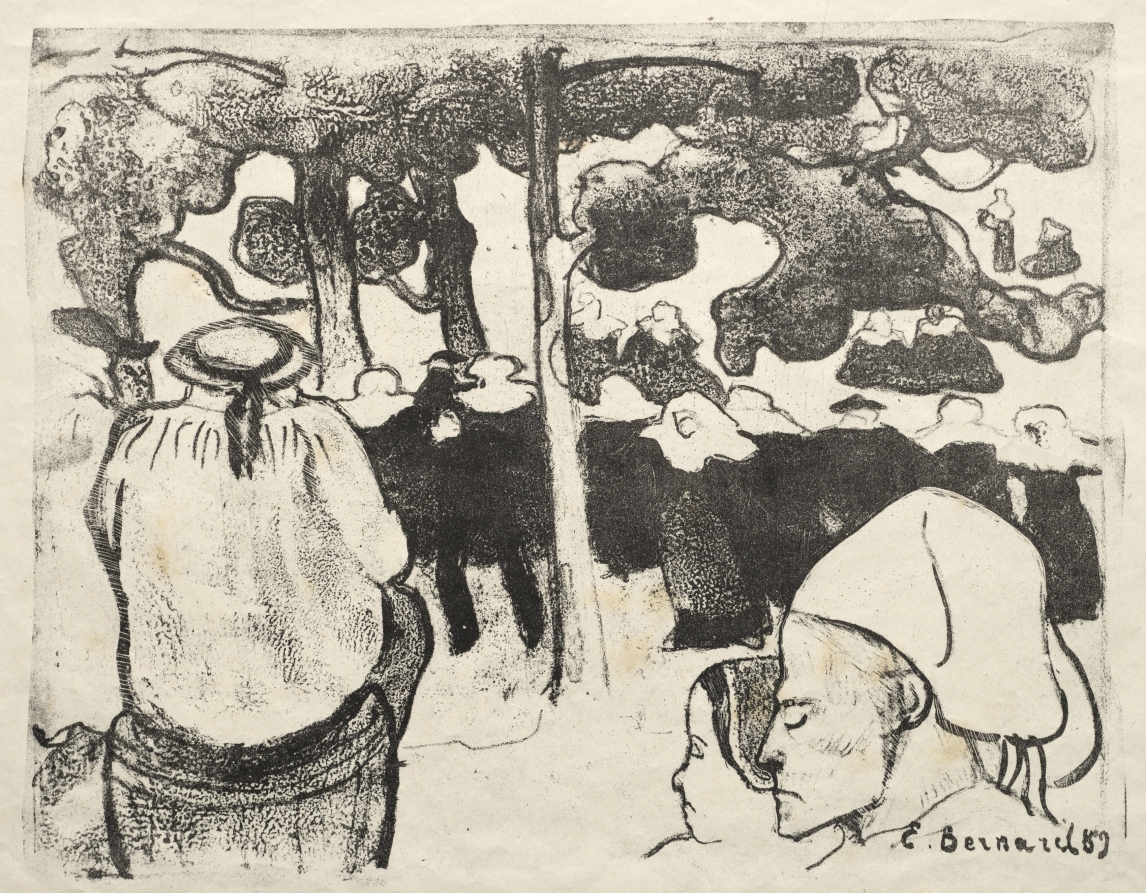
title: Les Bretonneries: Wedding in Brittany (La Noce en Bretange)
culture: France, 19th century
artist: Émile Bernard (French, 1868–1941)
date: 1889, printed 1896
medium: zincograph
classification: Print